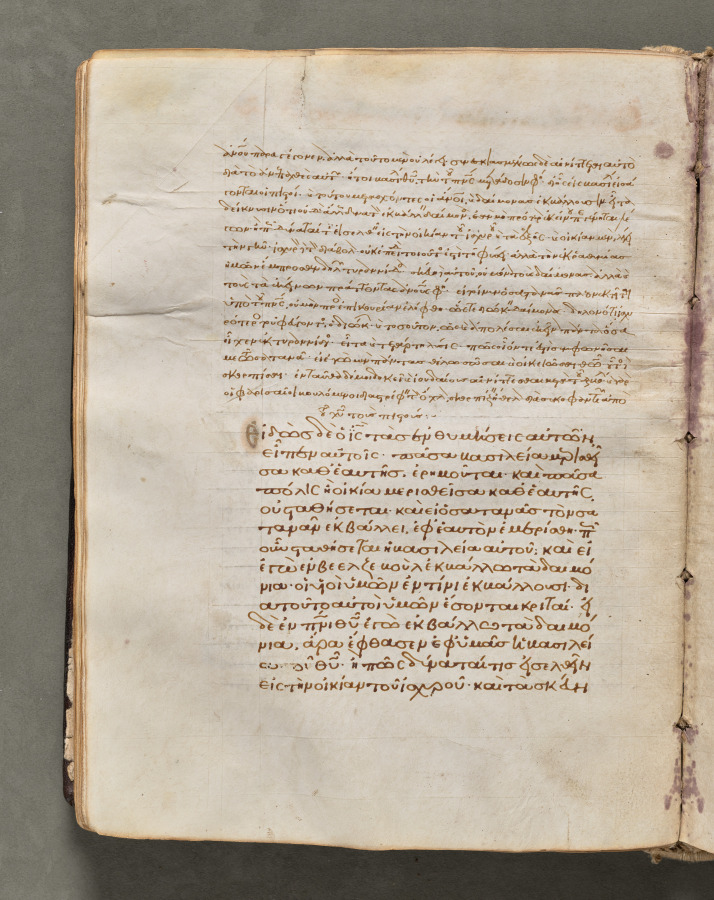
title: Text, folio 53 (verso), from a Gospel Book with Commentaries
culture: Byzantium, Constantinople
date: c. 1000–1100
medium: ink, tempera, and gold on vellum; leather binding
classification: Bound Volume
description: Each of the four gospels in this book opens on a page with brilliantly illuminated borders depicting the author of the text as well as birds-principally peacocks, symbols of the immortality of the soul-and fountains, representing the fountain of life and the salvation of the soul. This volume consists of 428 leaves with texts in Greek. Its level of sophistication suggests that it was probably written and decorated in a monastery in Constantinople.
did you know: Gospel Books were carried in procession through Byzantine churches.